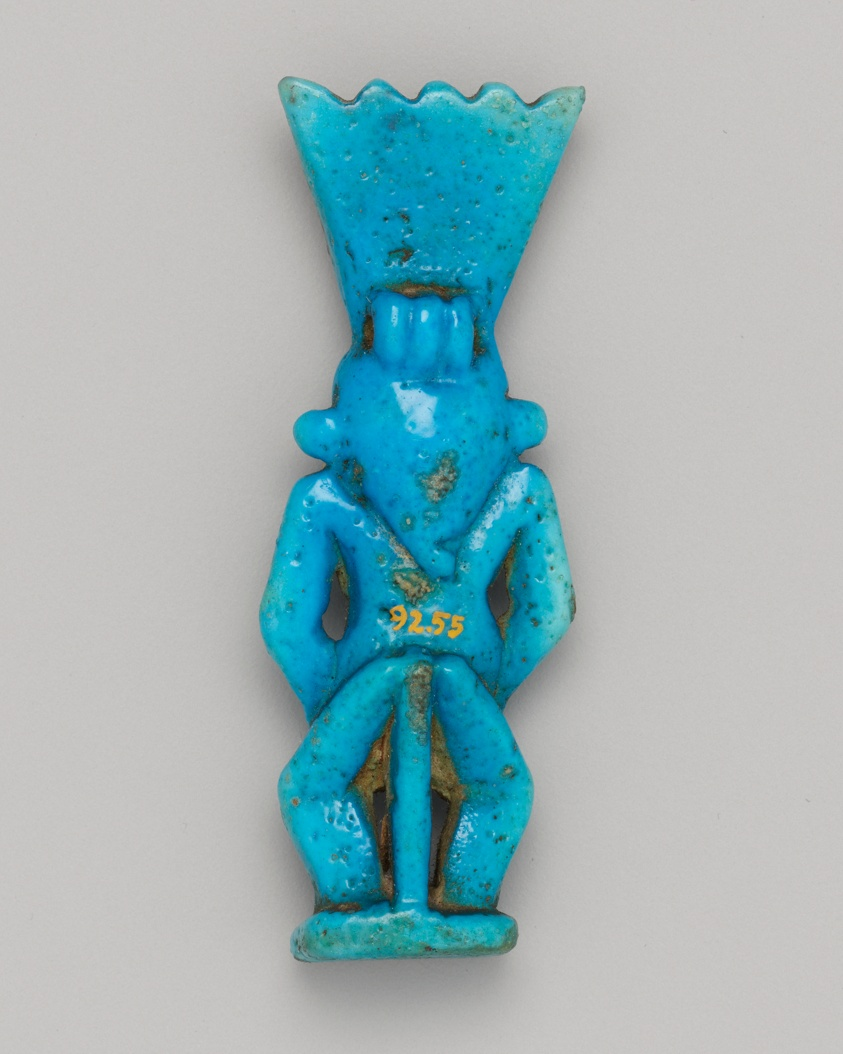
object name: Costume and Accessories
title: Amulet of Bes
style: late period (egyptian), ptolemaic, egyptian, ancient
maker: Egyptian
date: Late Period–Ptolemaic Period (664–30 BCE)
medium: Faience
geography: Egypt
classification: amulet; jewelry; ceramics; ancient art; costume; faïence (composite material)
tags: gods (deities)